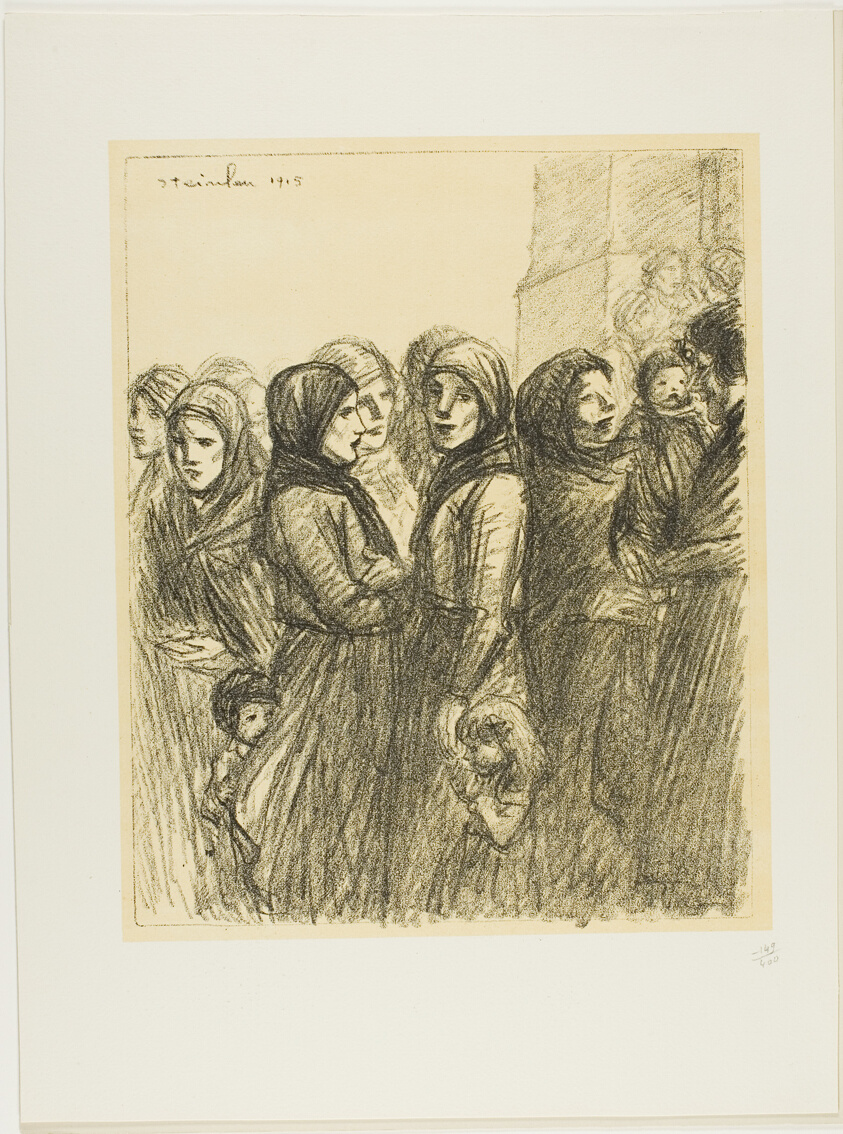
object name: Print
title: Military Allocation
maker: Théophile-Alexandre Steinlen; French, born Switzerland, 1859-1923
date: 1915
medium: Lithograph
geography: France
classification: lithograph; print; prints and drawing